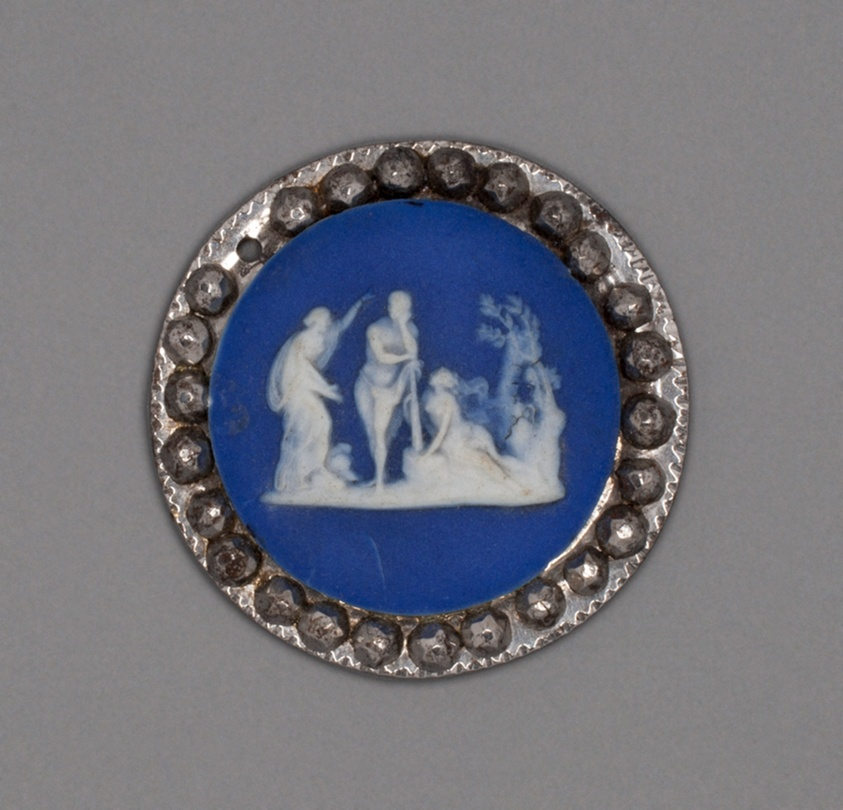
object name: Ceramics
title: Button with Choice of Hercules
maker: Wedgwood Manufactory (England, founded 1759)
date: Late 18th century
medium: Stoneware (jasperware)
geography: Burslem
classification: sculpture; stoneware; european decorative arts; ceramics